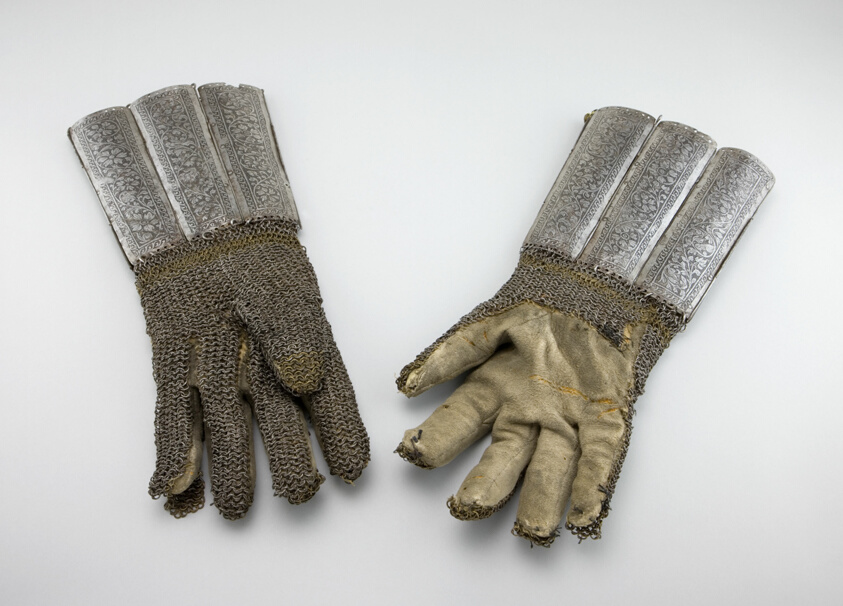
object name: Armor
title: Pair of Dueling Gauntlets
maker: Southern German; probably Nuremberg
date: 1580/1600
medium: Steel, iron, brass, and leather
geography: Nuremberg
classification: suit-gauntlet; armor; arms and armor